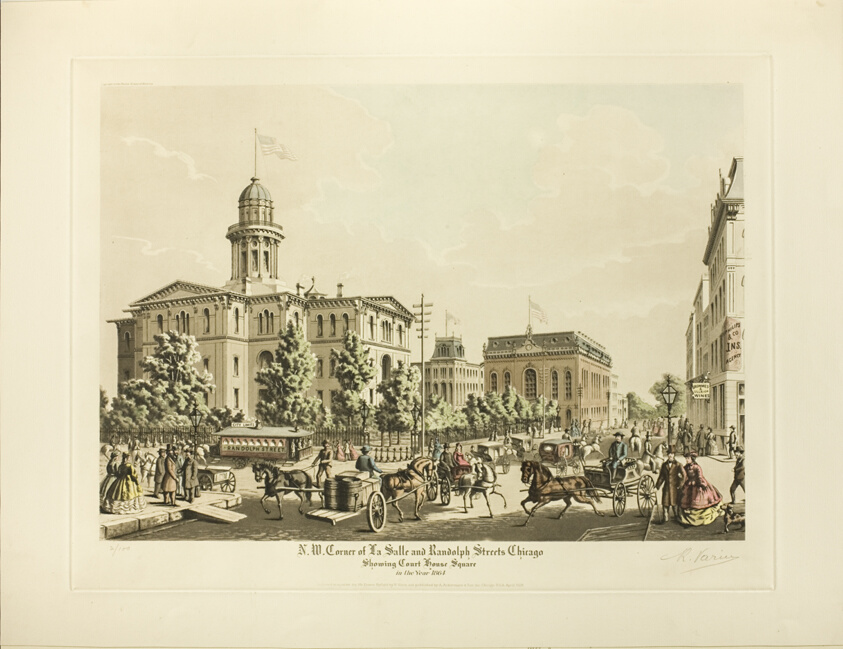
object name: Print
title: N. W. Corner of LaSalle and Randolph, Chicago, Showing Court House Square in the Year 1864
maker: Raoul Varin (French, 1865-1943)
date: published April 1928 (1864 depicted)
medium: Aquatint, with etching in brown and hand-coloring, on cream wove paper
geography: France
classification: aquatint; print; prints and drawing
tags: Chicago